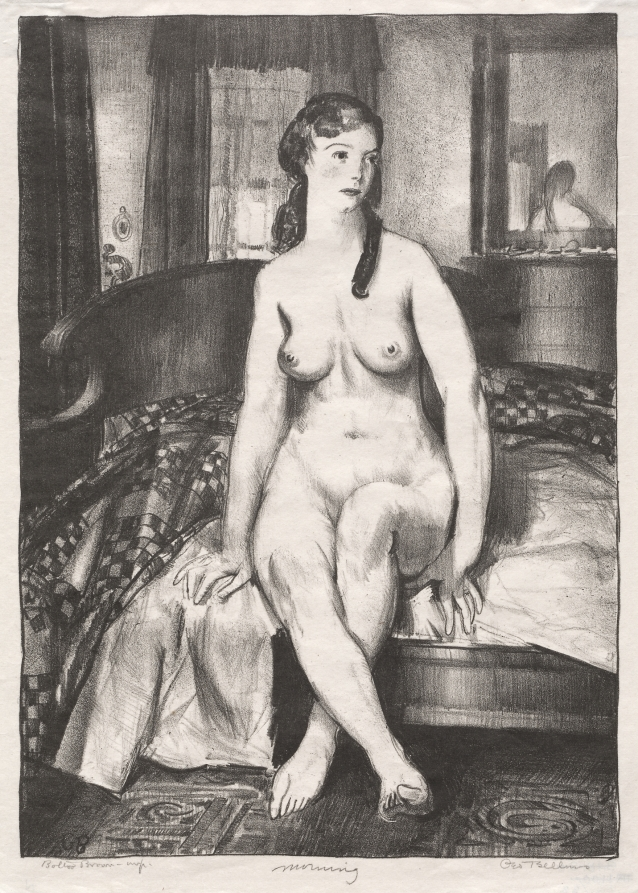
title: Morning, Nude on Bed, Second Stone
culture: America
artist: George Bellows (American, 1882–1925)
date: 1921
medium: lithograph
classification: Print